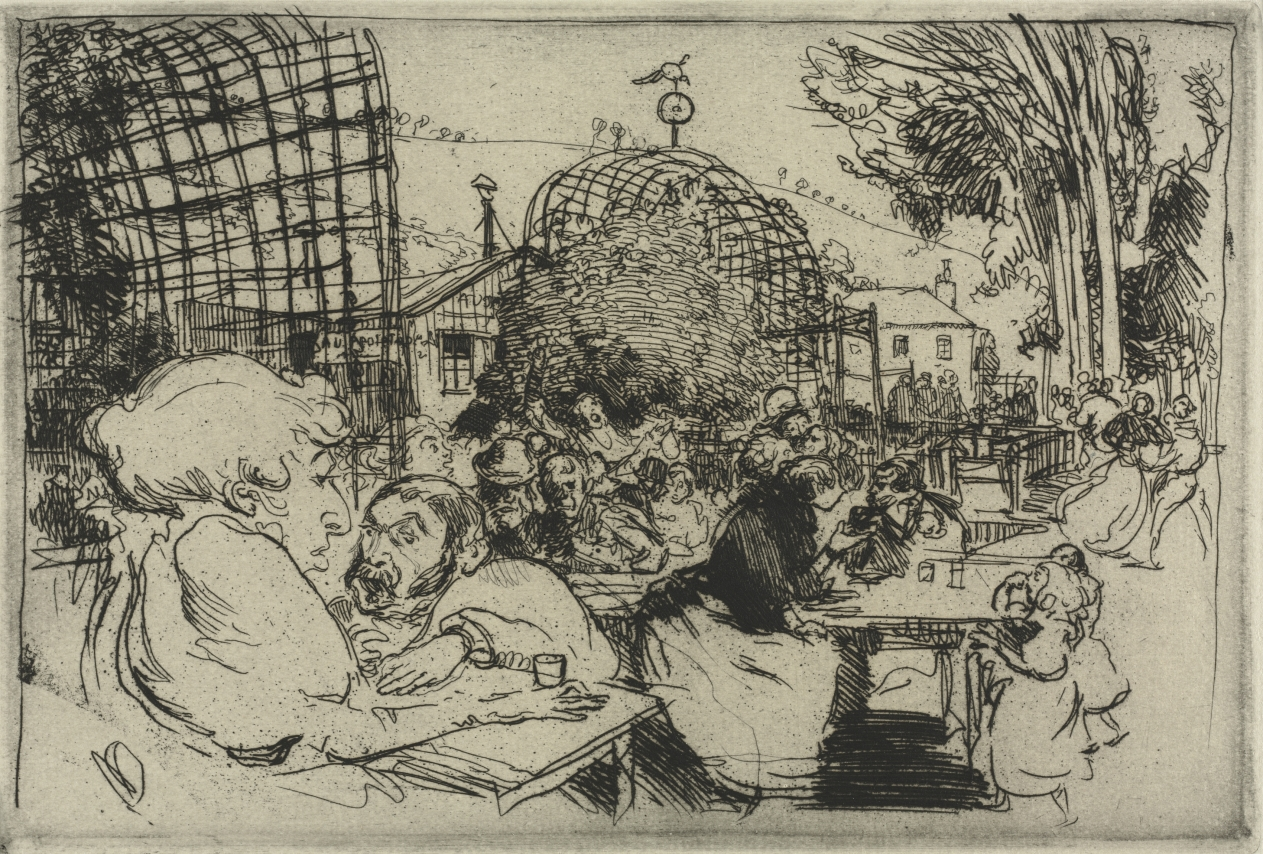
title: The Two Hunchbacks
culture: France, 19th century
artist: Auguste Louis Lepère (French, 1849–1918)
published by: Edward Sagot, Paris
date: 1893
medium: etching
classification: Print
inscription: lower right, in red pencil: A. Lepere-15; tir 35